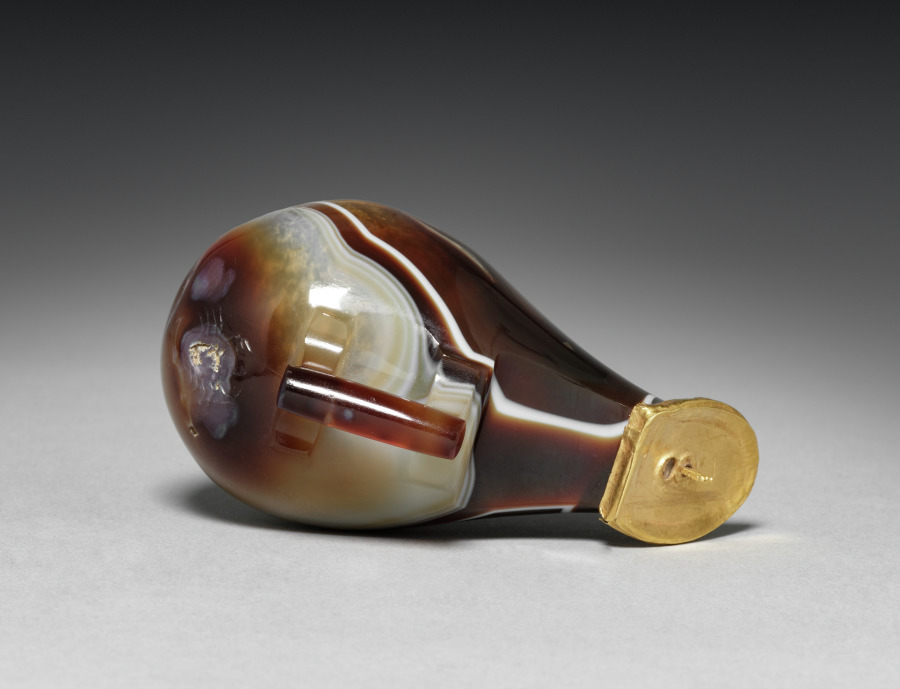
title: Askos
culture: Greece, Ptolemaic Dynasty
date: 200–1 BCE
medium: agate and gold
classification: Cosmetic Objects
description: This miniature vessel was carved from a single piece of banded agate, polished to a shine, and embellished with a gold lid and gold details on the base. Inside the ring of gold at the base is a trio of gold papyrus stalks, a likely reference to Egypt. In shape, it resembles an ancient wineskin, or askos, though its small size suggests use for luxury perfumes or oils. A tiny crab, likely once inlaid with a precious material, has been carved behind the handle.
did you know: The knob on the lid connects to a hidden disk to control the flow of liquid.